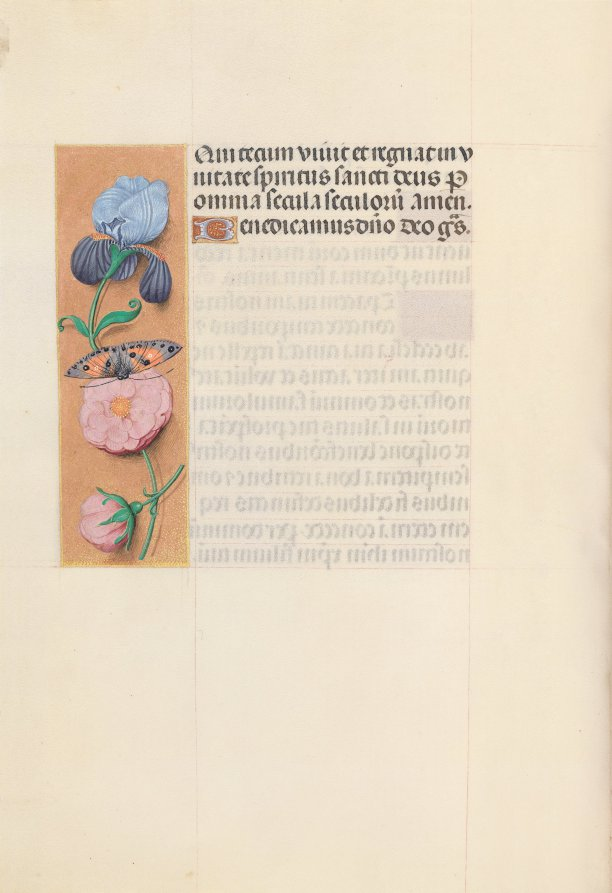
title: Hours of Queen Isabella the Catholic, Queen of Spain: Fol. 145v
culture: Flanders, Ghent and Bruges, late 15th century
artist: Master of the First Prayerbook of Maximillian (Flemish, c. 1444–1519)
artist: and Associates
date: c. 1500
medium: ink, tempera, and gold on vellum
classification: Bound Volume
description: This manuscript was illuminated by a circle of at least five highly organized manuscript painters active in the Flemish cities of Ghent and Bruges. The principal illuminator was Alexander Bening, who painted the majority of the book's miniatures. Manuscripts produced by this circle of artists are renowned for the decoration of their borders, which typically feature a rich variety of realistically-painted flowers, birds, and butterflies. This prayer book, called a book of hours, was intended not for a cleric, but for the private devotions of a lay person-in this case, Isabella the Catholic, Queen of Spain (1451-1504). Isabella's coat of arms embellishes the book's frontispiece. It is unlikely that the book was commissioned by the Queen herself; rather, she probably received it as a diplomatic gift from someone courting her patronage, perhaps Cardinal Francisco Jimenez de Cisneros. A Franciscan friar, Jimenez was dependent upon Isabella for his advancement, first to the post of Queen's confessor in 1492, and then to Archbishop of Toledo in 1495.